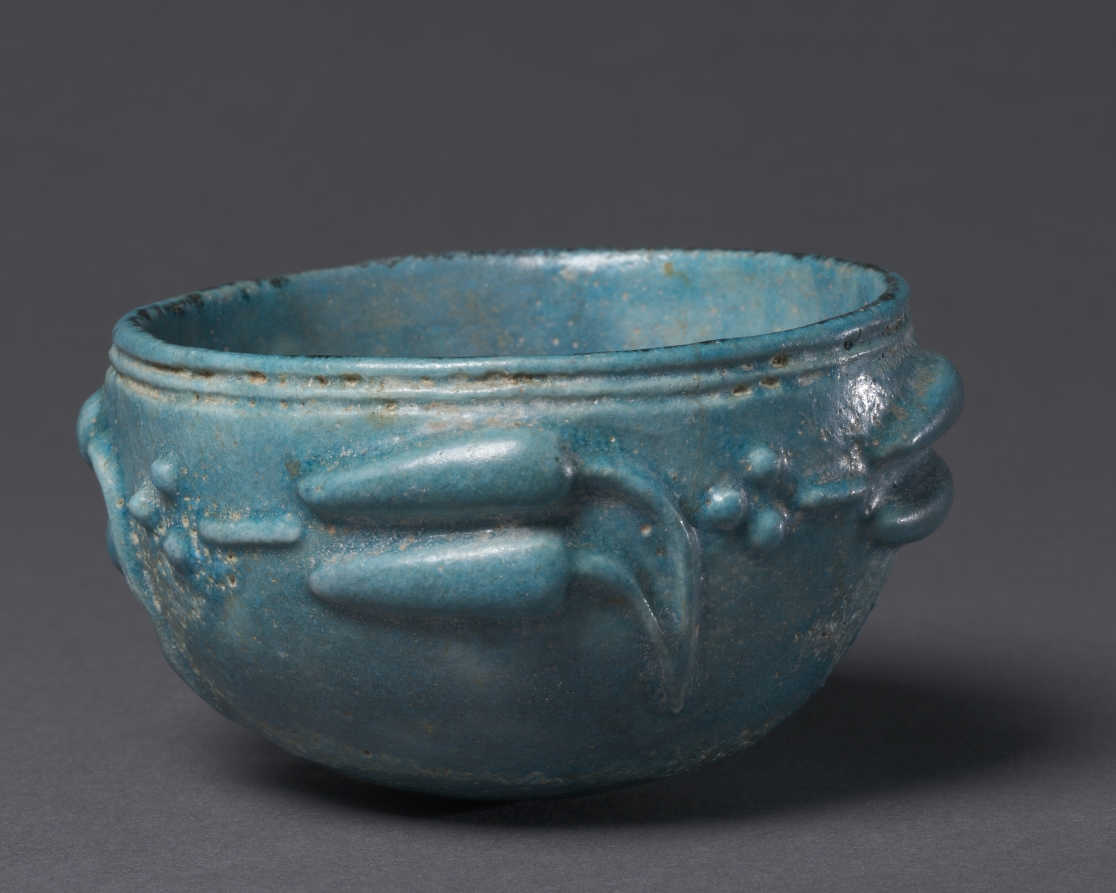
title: Bowl with Lotus Bud Decoration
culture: Egypt, Greco-Roman period (332 BCE–395 CE), Roman empire (30 BCE–395 CE)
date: 1–200 CE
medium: bright turquoise blue faience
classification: Vessels